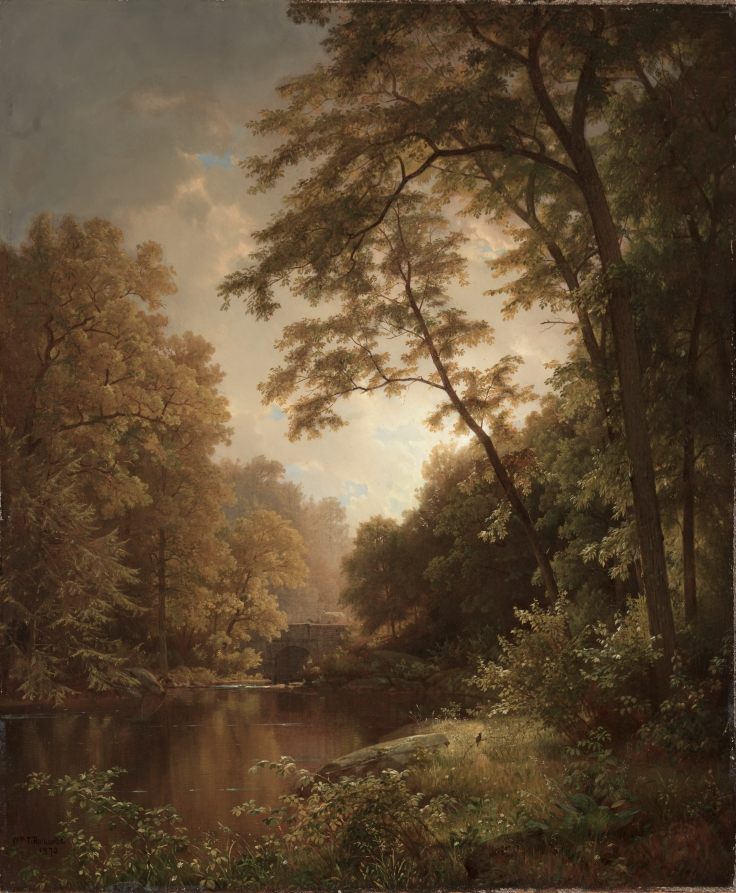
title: June Day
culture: America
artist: William Trost Richards (American, 1833–1905)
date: 1870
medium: oil on canvas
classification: Painting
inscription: signed lower left: Wm T. Richards. / 1870